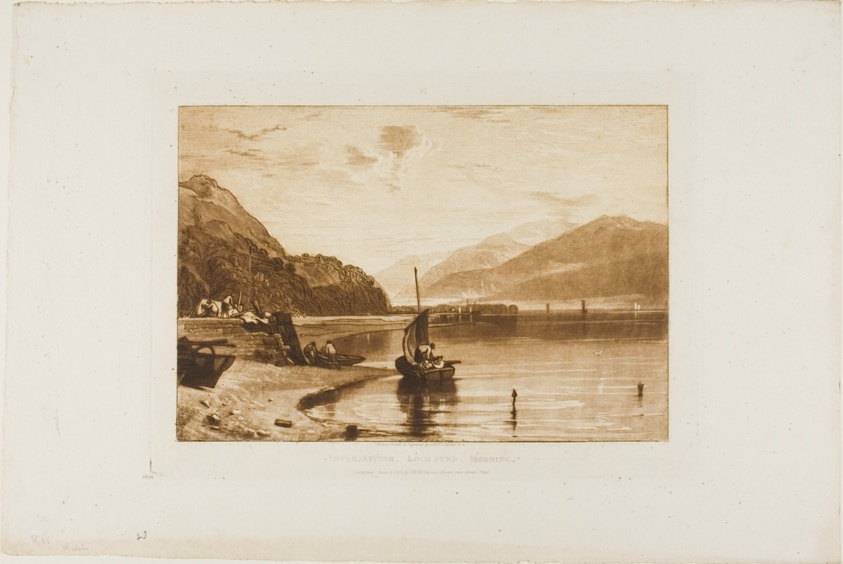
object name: Print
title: Inverary Pier, plate 35 from Liber Studiorum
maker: Joseph Mallord William Turner (English, 1775-1851)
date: published June 1, 1811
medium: Etching and engraving in brown on ivory wove paper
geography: England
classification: etching; print; prints and drawing